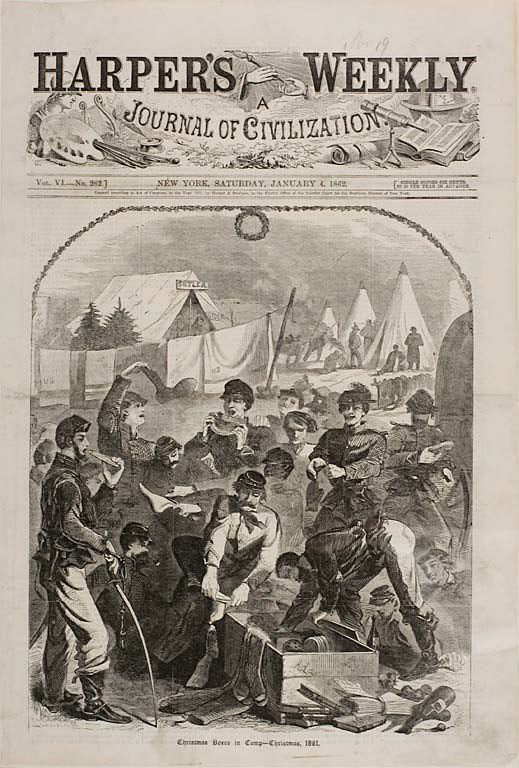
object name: Print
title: Christmas Boxes in Camp—Christmas, 1861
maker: Winslow Homer (American, 1836-1910); published by Harper's Weekly (American, 1857-1916)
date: published January 4, 1862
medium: Wood engraving on paper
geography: United States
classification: wood engraving; print; prints and drawing